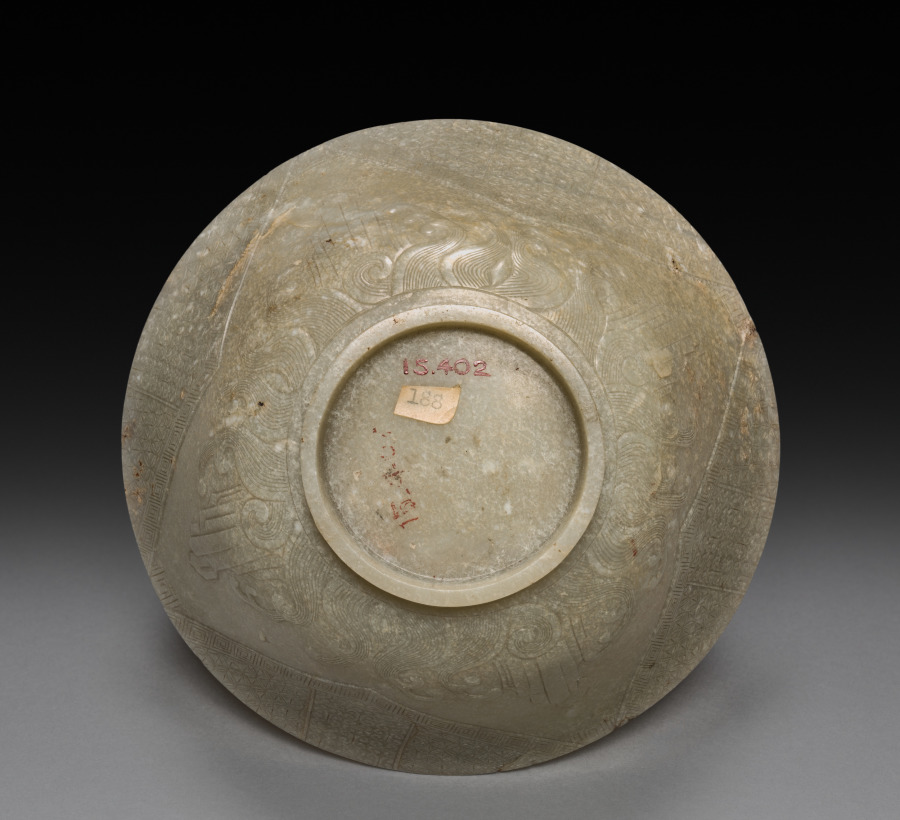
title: Bowl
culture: China, Qing dynasty (1644-1911), Kangxi reign (1661-1722)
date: 1662–1722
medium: jade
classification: Jade